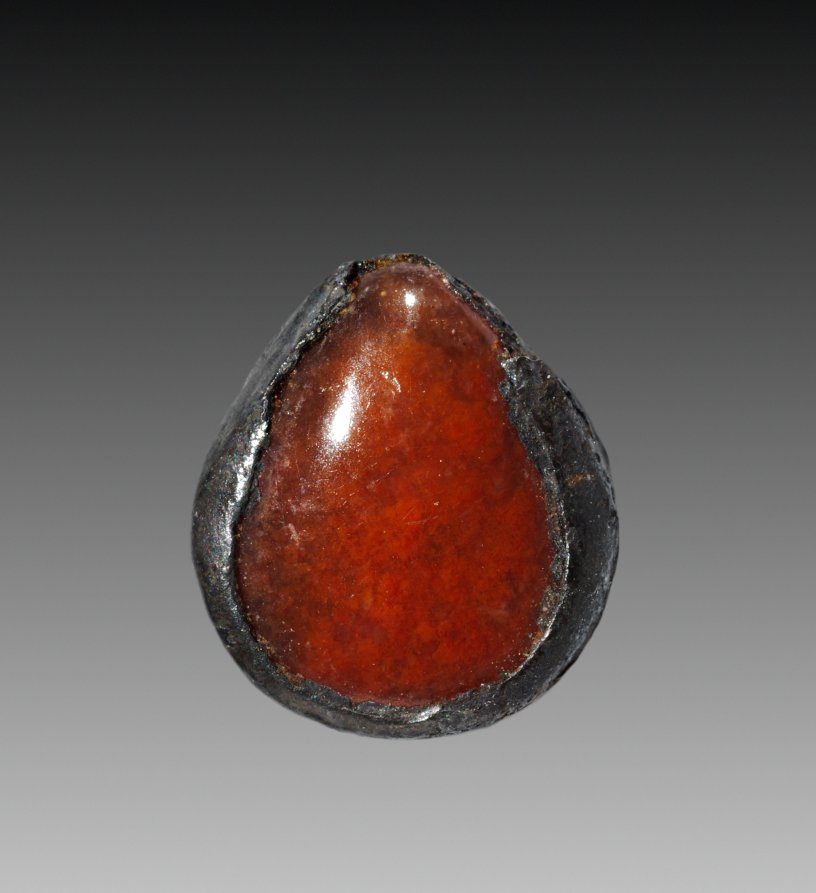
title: Oyster-Shell Pendant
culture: Egypt, Middle Kingdom (2040–1648 BCE), Dynasty 12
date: 1980–1801 BCE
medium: carnelian and silver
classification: Jewelry